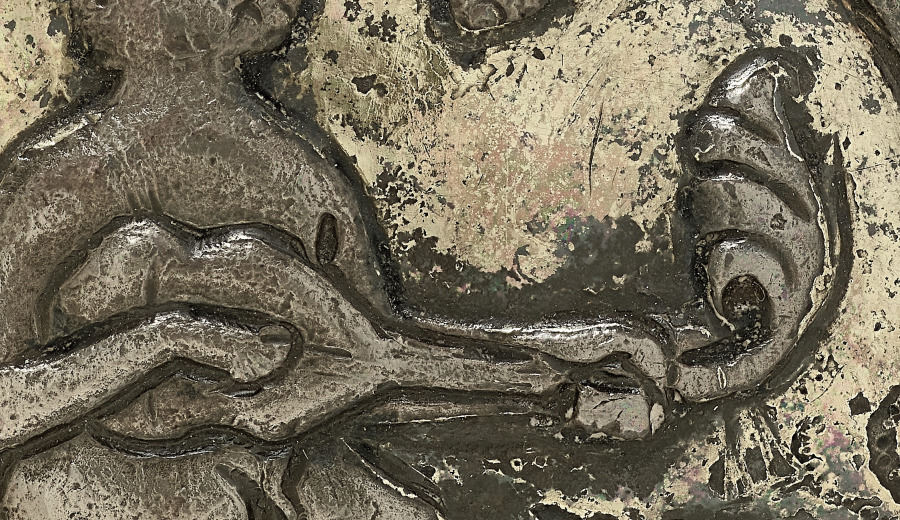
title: Bowl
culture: Iran, Sasanian Empire (224–651 CE)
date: 500–700 CE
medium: silver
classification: Metalwork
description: Every good Zoroastrian was supposed to spend one-third of his day farming; one-third philosophizing; and one-third eating, resting, and at pleasure. The abundance of Sasanian luxury goods is evidence of the importance accorded the last third of the day.